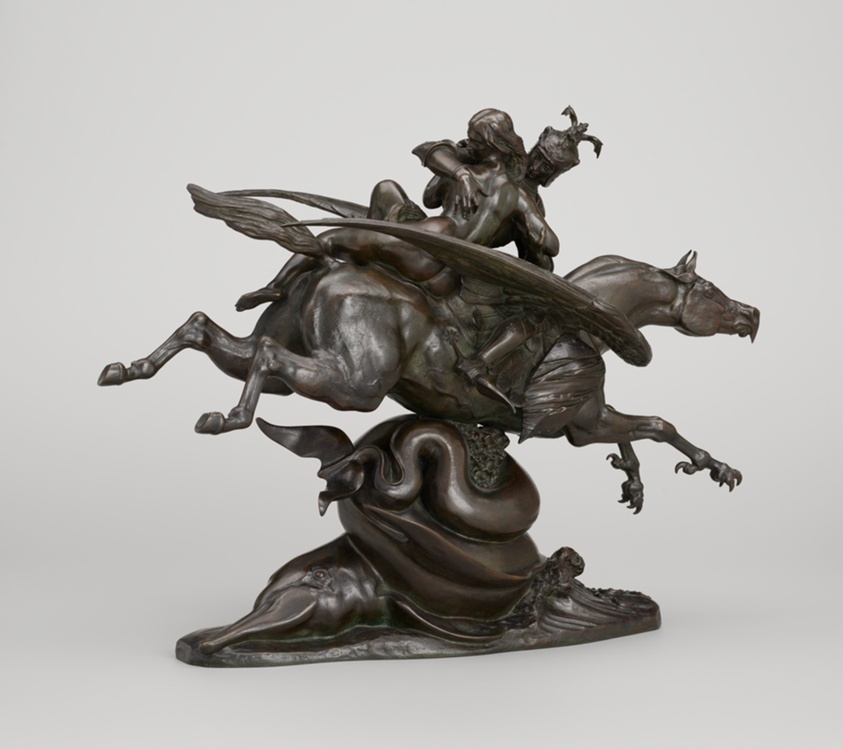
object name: Sculpture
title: Roger and Angelica Mounted on the Hippogriff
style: nineteenth century, 19th century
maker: Antoine Louis Barye (French, 1795–1875)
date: Modeled c. 1840, cast c. 1884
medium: Bronze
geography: France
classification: statuette; french; sculpture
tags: mythical, woman, royalty, royal, poetry, man, knights, fantastic beasts, animals